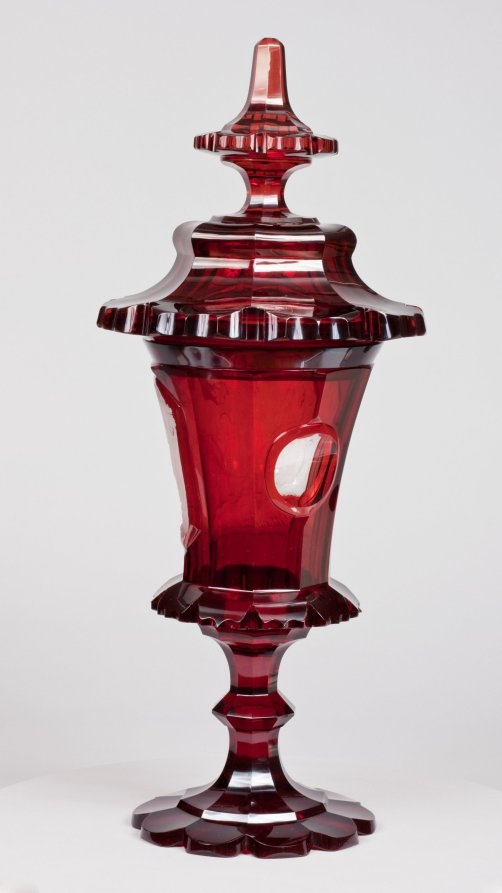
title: Covered Cup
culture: Bohemia, 19th century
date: mid-1800s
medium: ruby glass with engraved decoration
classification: Glass